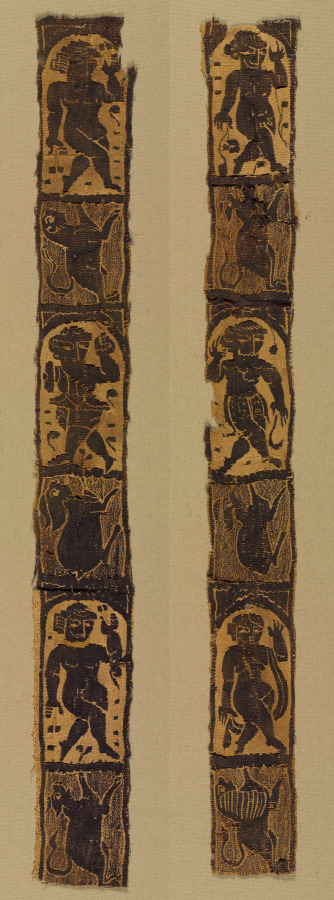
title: Ornamental Shoulder Bands from a Tunic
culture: Egypt, Byzantine period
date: 500s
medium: tapestry weave with supplementary weft wrapping; undyed linen and dyed wool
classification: Textile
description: This fragment shows human figures including dancers, a hunter, and shepherd under arches alternating with animals such as dogs, rabbits, and a lion. The orientation of the figures indicates that these vertical bands were once part of a tunic. The decorative bands would have descended from the shoulders. Since the mid-3rd century tunics were the main garments worn in Egypt which was then part of the Roman Empire.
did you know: One band contains a nude female dancer playing finger cymbals while the other shows a shepherd carrying a crook and dressed in a skirt of animal skin.